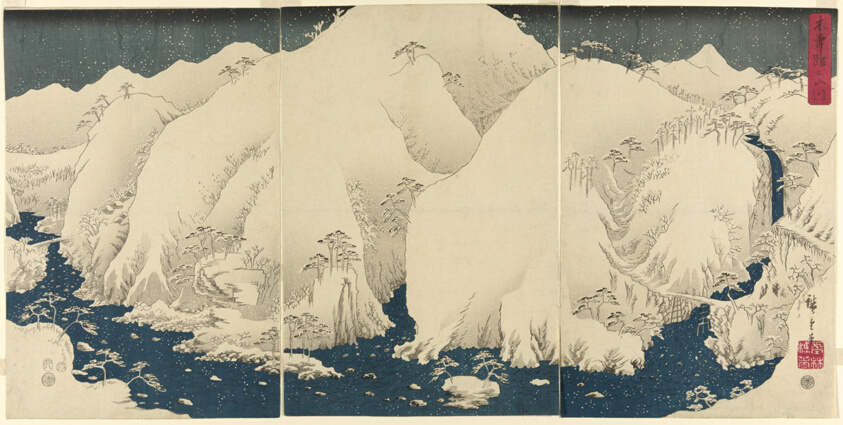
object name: Print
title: Mountain and River on the Kiso Road (Kisoji no yamakawa)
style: Japanese (culture or style), edo (japanese period), Japanism, East Asian, asian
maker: Utagawa Hiroshige 歌川 広重; Japanese, 1797-1858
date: 1857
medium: Color woodblock print; oban triptych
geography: Japan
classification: print; asian art